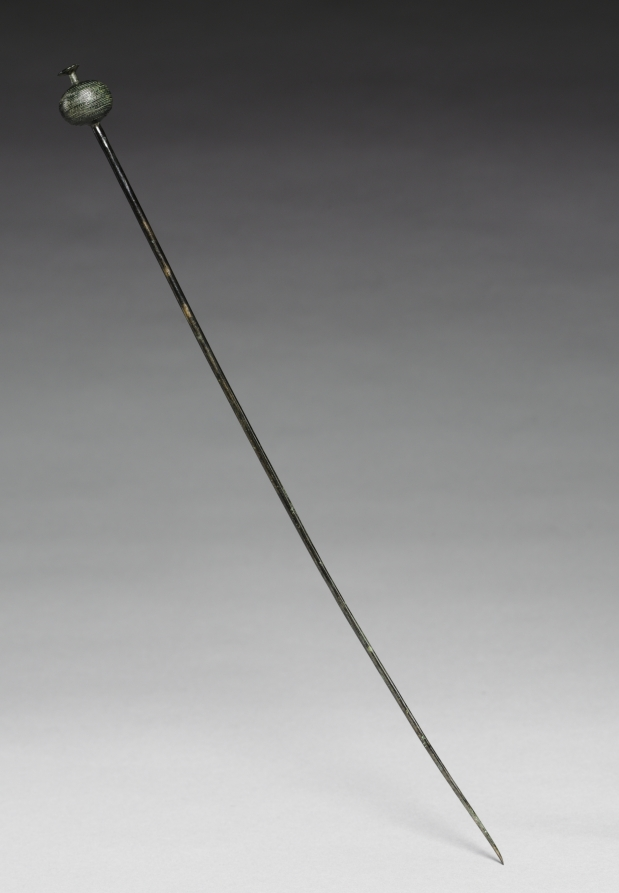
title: Garment Pin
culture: possibly Hungary, Bronze Age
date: c. 1400 BCE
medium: cast and wrought bronze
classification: Jewelry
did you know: This metal pin was used to fasten clothing.